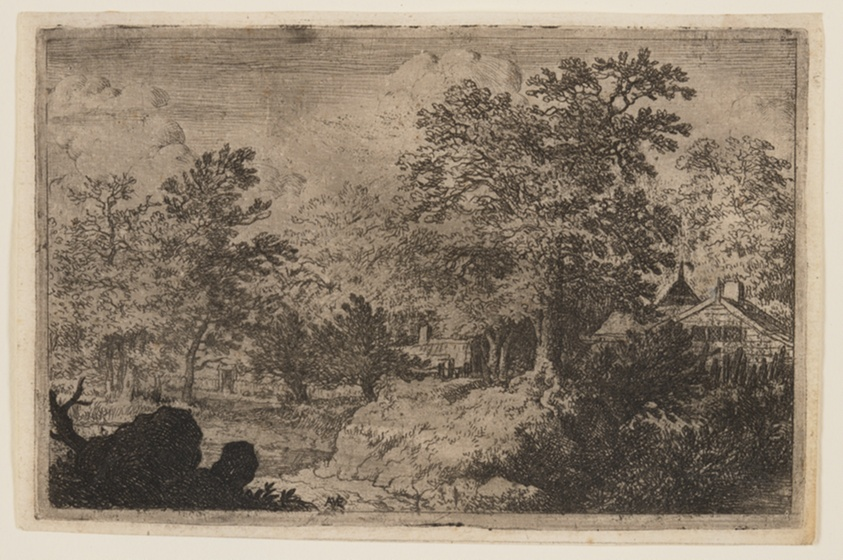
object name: Print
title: The Oak on the Hill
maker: Allaert van Everdingen (Dutch, 1621–1675)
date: c. 1640-1670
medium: Etching and plate tone on ivory laid paper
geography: Netherlands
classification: etching; paper; print; prints and drawing